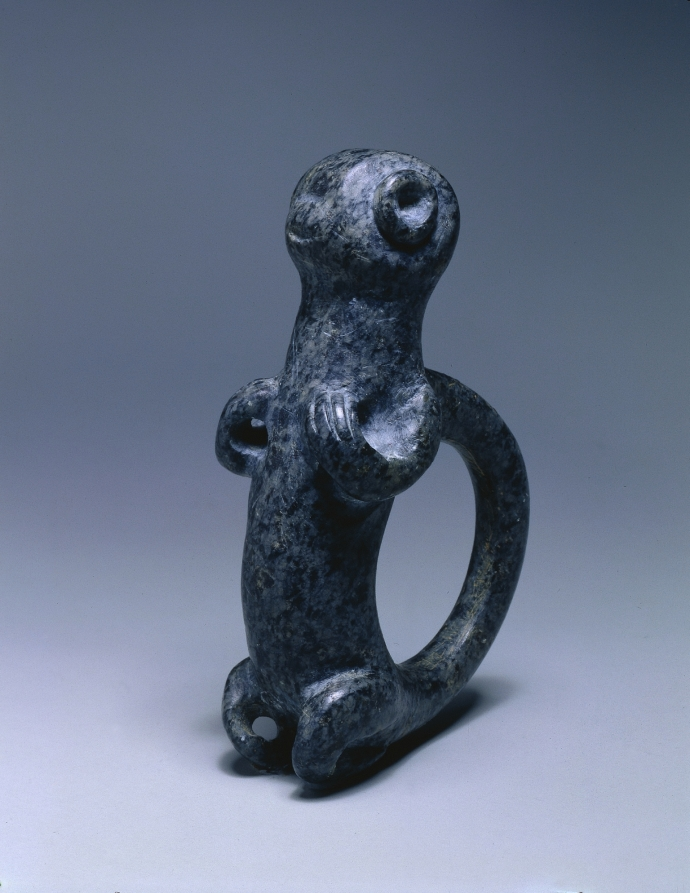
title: Monkey Pendant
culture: Panama, International Style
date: c. 400–900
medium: stone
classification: Sculpture